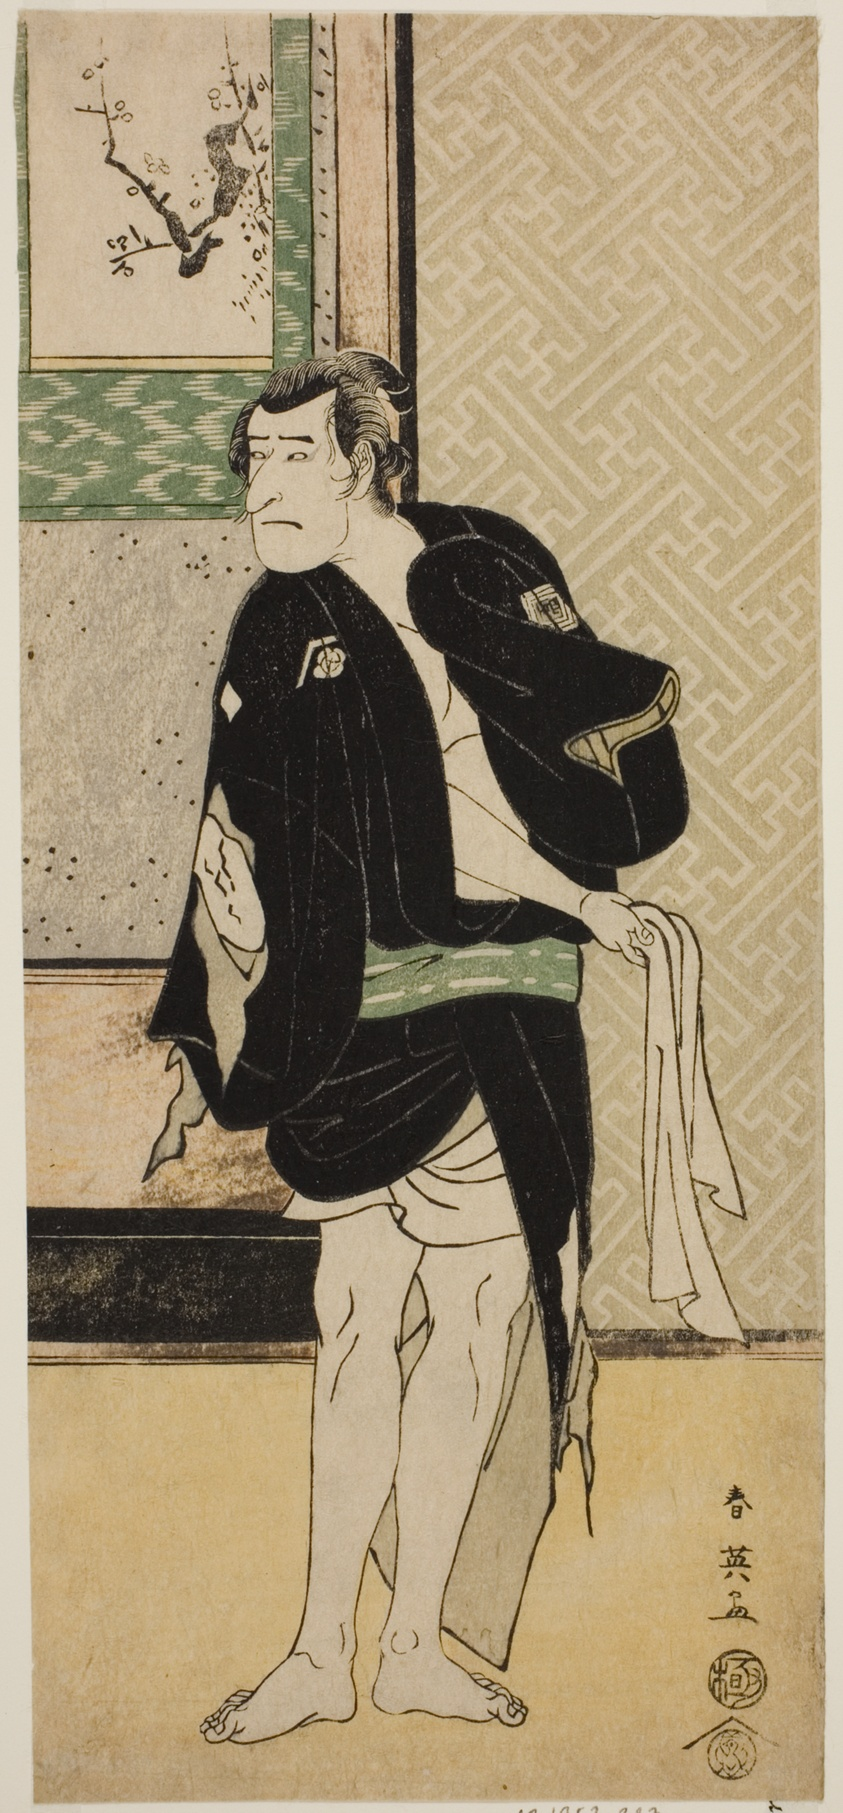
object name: Print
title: The Actor Ichikawa Komazo II as Soga no Dozaburo Disguised as the Ruffian Tobei (?) in the Play Haru no Nishi Date-zome Soga (?), Performed at the Nakamura Theater (?) in the First Month, 1790 (?)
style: Japanese (culture or style)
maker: Katsukawa Shun'ei (Japanese, 1762-1819)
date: c. 1790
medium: Color woodblock print; hosoban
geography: Japan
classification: woodblock print; print; asian art